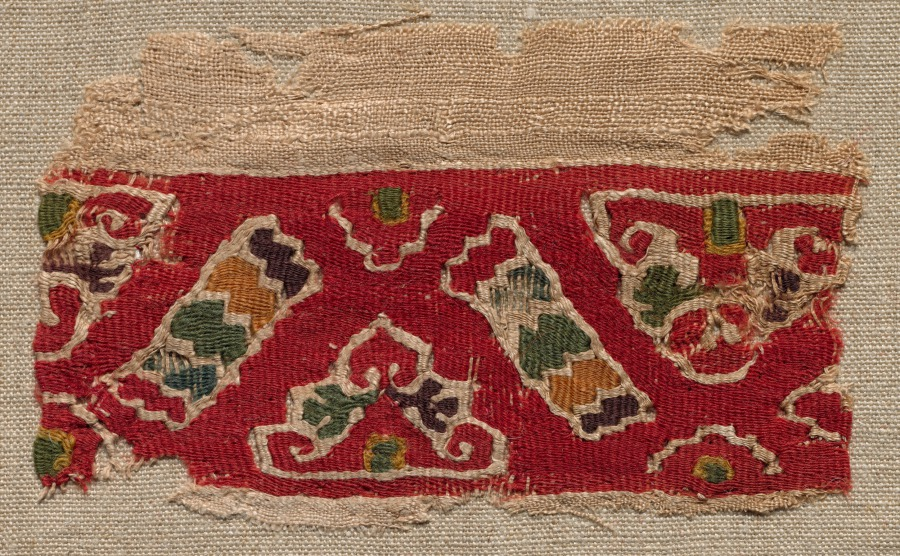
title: Fragment, with Part of a Clavus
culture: Egypt, Abbasid period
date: early 800s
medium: tabby weave, inwoven tapestry ornament; wool and linen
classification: Textile